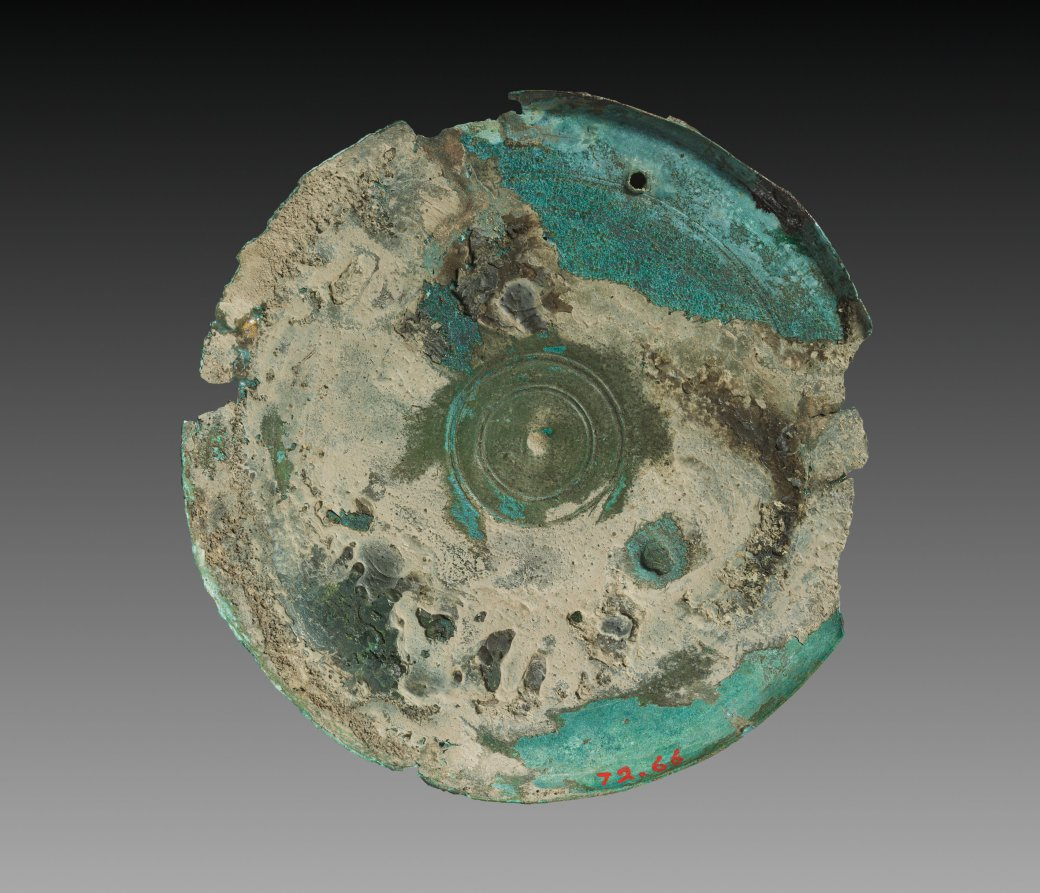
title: Box Mirror with Head of Athena (lid)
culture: Greece, Hellenistic period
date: 330–270 BCE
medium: bronze, partially gilt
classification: Metalwork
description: The ancient Greek box mirror resembles a modern, hinged makeup compact in design. While the actual mirror is the top of the bottom half of the box – a highly polished cast-bronze disk – the cover often bears relief decoration. This example features a helmeted head of Athena, a virgin war goddess not typically associated with implements of beauty. Several other aspects suggest that this Athena may have been repurposed from another object in antiquity: the striking difference in patina between relief and case; the irregular (non-circular) shape; and the method of attachment, with rivets through the relief rather than solder.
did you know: The head of Athena on this mirror likely came from a different ancient object.